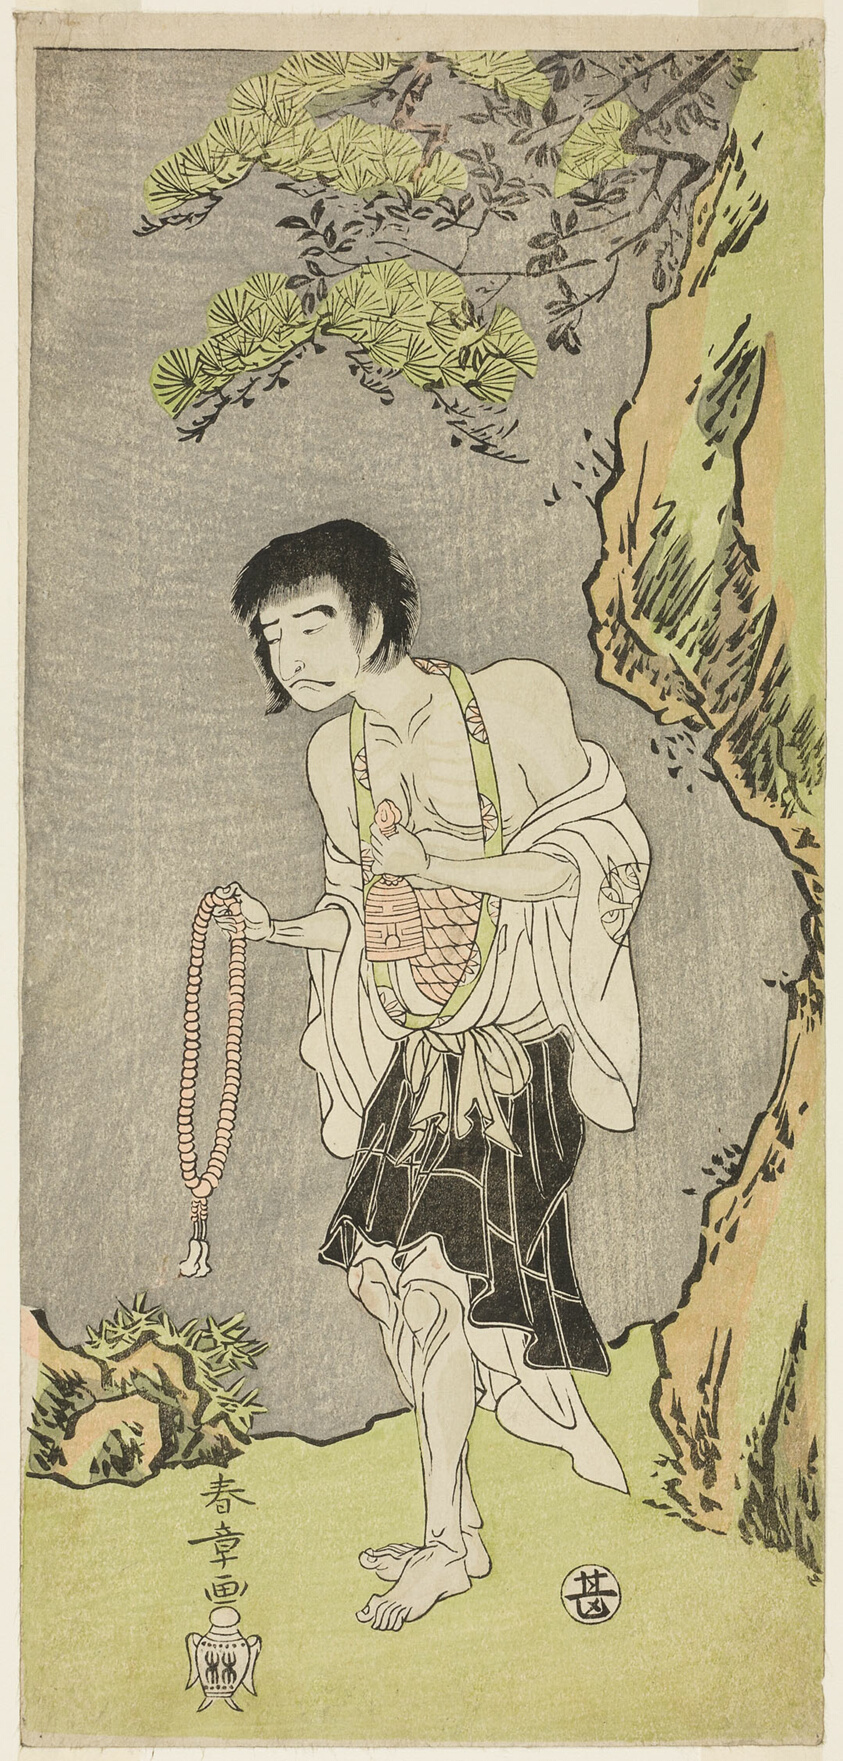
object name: Print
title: The Actor Nakamura Nakazo I as a Monk, Raigo Ajari, in the Play Nue no Mori Ichiyo no Mato (Forest of the Nue Monster: Target of the Eleventh Month), Performed at the Nakamura Theater from the First Day of the Eleventh Month, 1770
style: Japanese (culture or style)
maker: Katsukawa Shunsho 勝川 春章; Japanese, 1726-1792; Publisher: Maruya Jimpachi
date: c. 1770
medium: Color woodblock print; hosoban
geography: Japan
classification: woodblock print; print; asian art